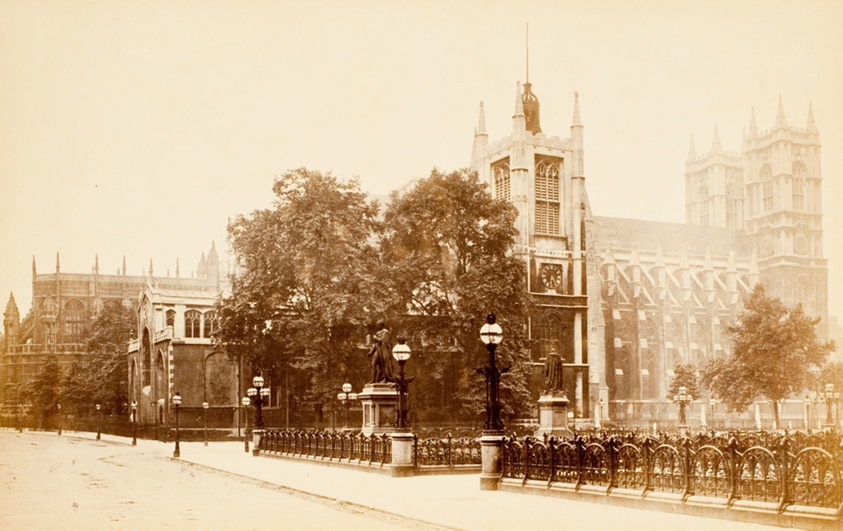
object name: Photograph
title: Westminster Abbey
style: 19th century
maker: Artist unknown; probably English, 19th century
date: 1850–1900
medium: Albumen print, from the album "Views of London"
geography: England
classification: albumen silver print; photographic process; photography; photograph